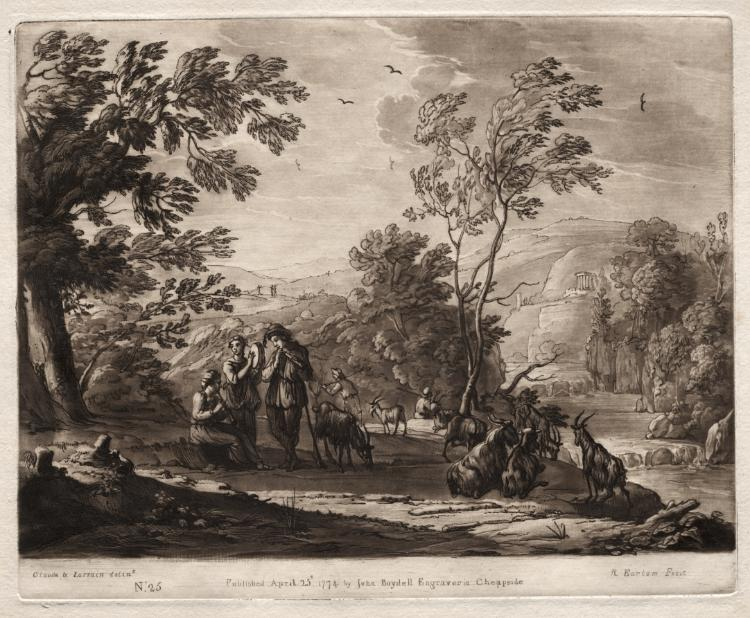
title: Liber Veritatis: No. 25, A Mountainous and Wooded Landscape with Shepherds Playing and Goats Browsing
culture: England, 18th century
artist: Richard Earlom (British, 1743–1822)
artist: after Claude Lorrain (French, 1604–1682)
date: 1774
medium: etching and mezzotint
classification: Print